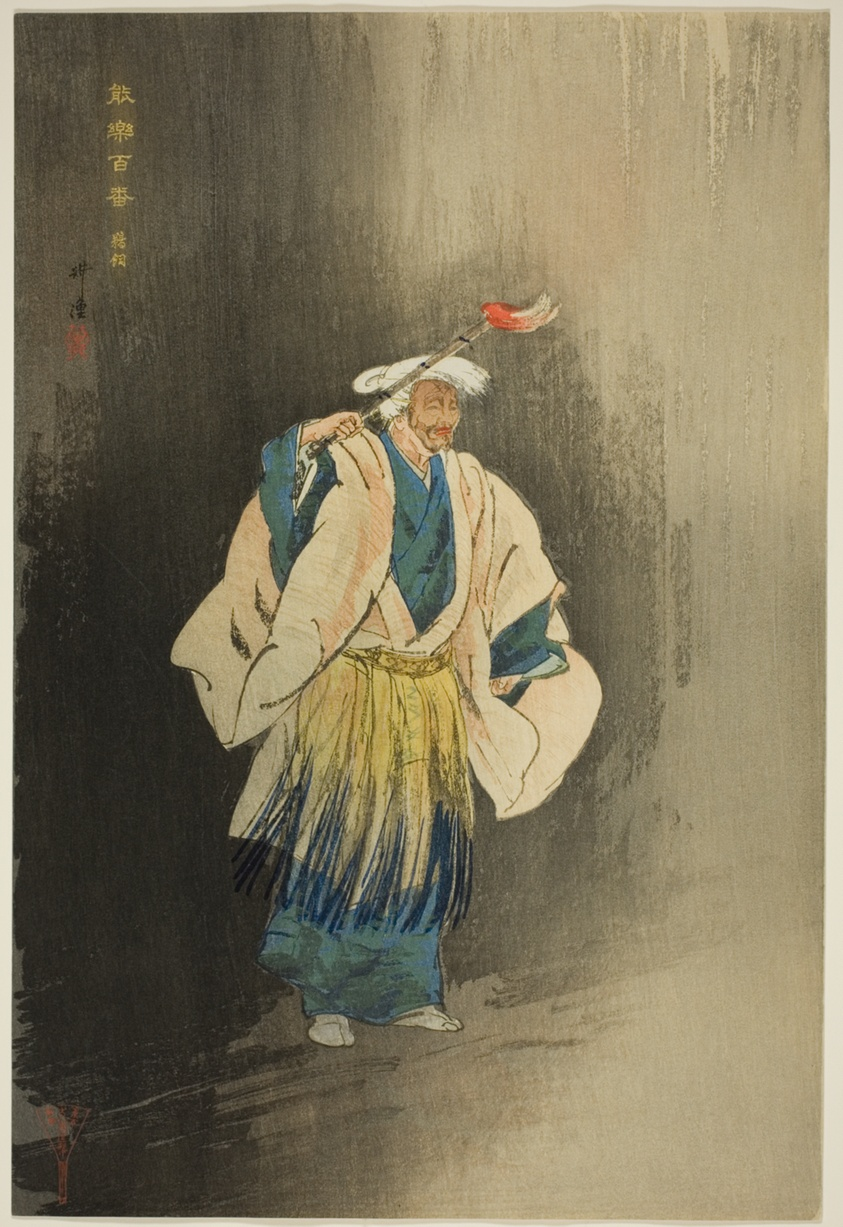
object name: Print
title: Ukai, from the series "One Hundred No Dramas (Nogaku hyakuban)"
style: Japanese (culture or style)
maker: Tsukioka Kogyo; Japanese, 1869-1927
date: 1898/1903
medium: Color woodblock print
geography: Japan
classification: woodblock print; print; asian art